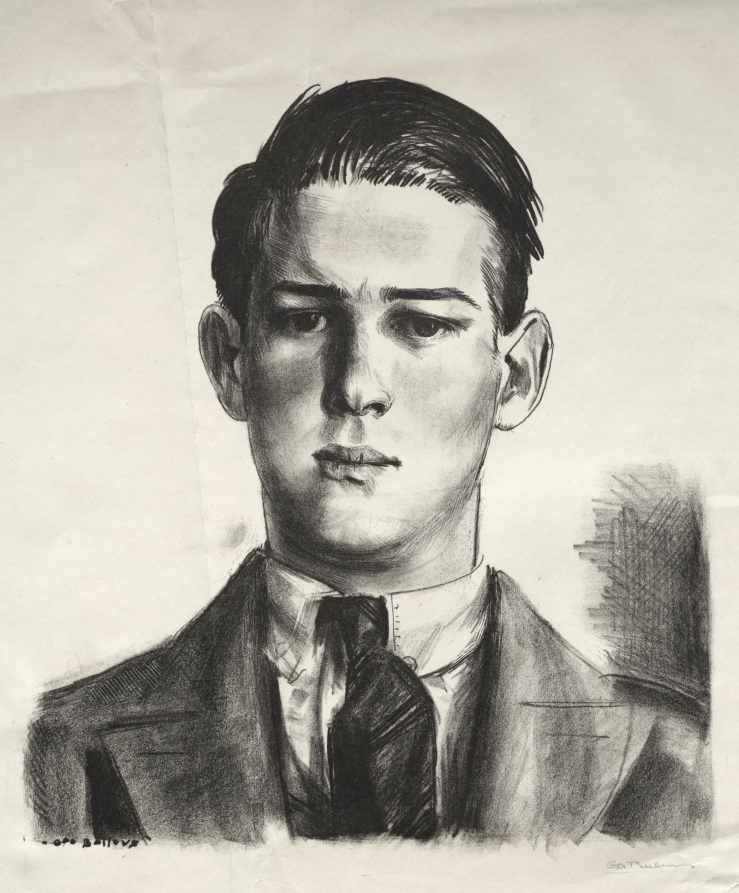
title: Head of Gregory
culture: America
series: 181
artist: George Bellows (American, 1882–1925)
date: 1924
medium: lithograph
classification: Print